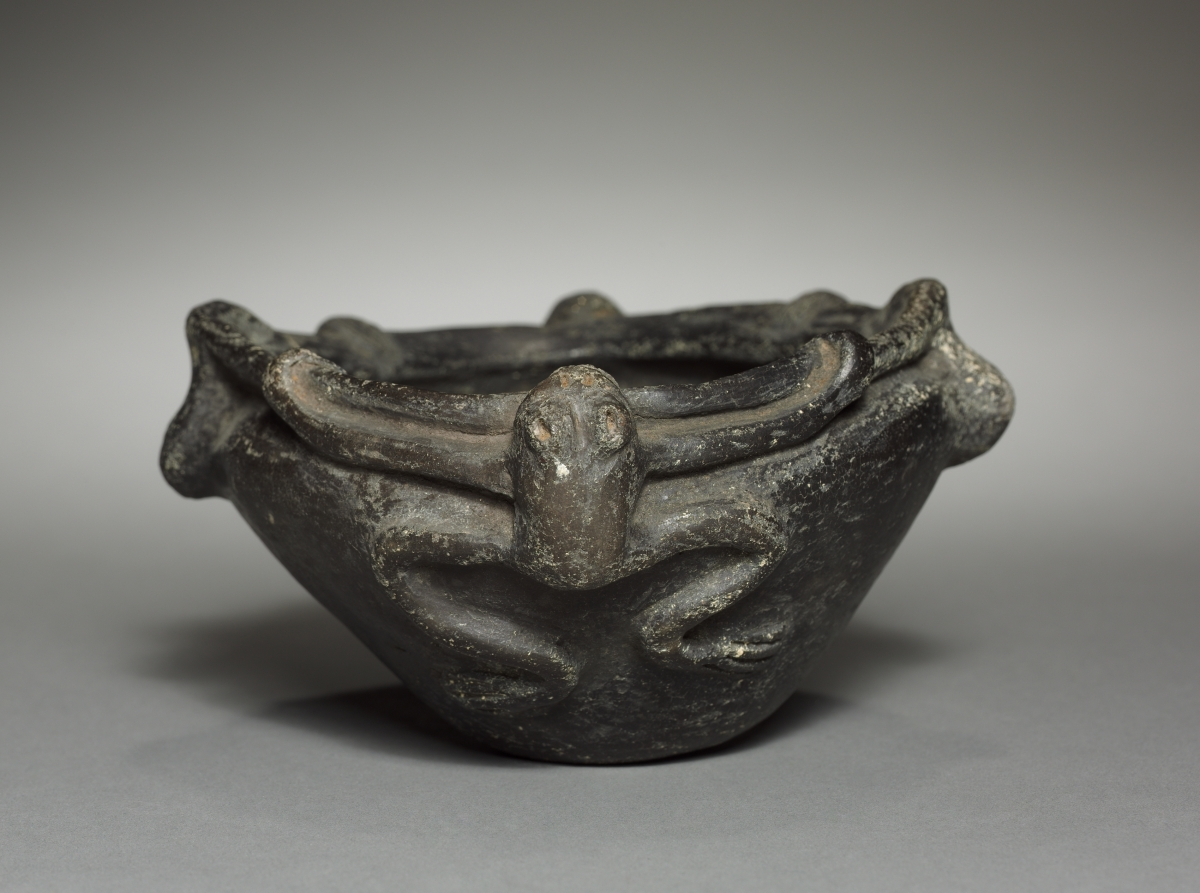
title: Bowl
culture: Colombia, 19th-20th century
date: before 1921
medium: black ware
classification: Ceramic